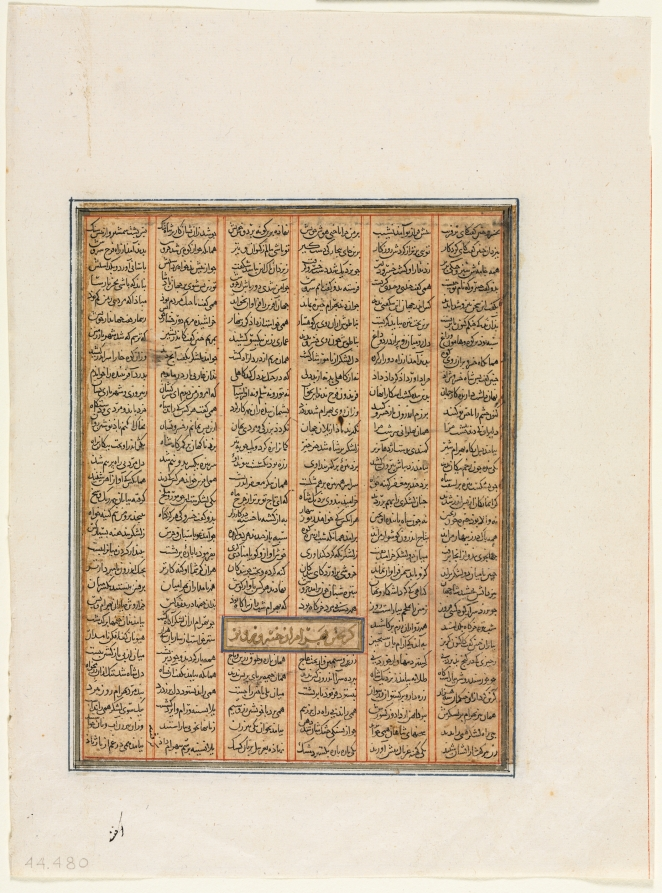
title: Bahram Chubineh captured by Khusrau Parviz (verso), from a Shahnama (Book of Kings) of Firdausi (940–1019 or 1025)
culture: Iraq, Baghdad, Ilkhanid period (1256-1353)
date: c. 1299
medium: ink and opaque watercolor on paper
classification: Manuscript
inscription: script: Naskh